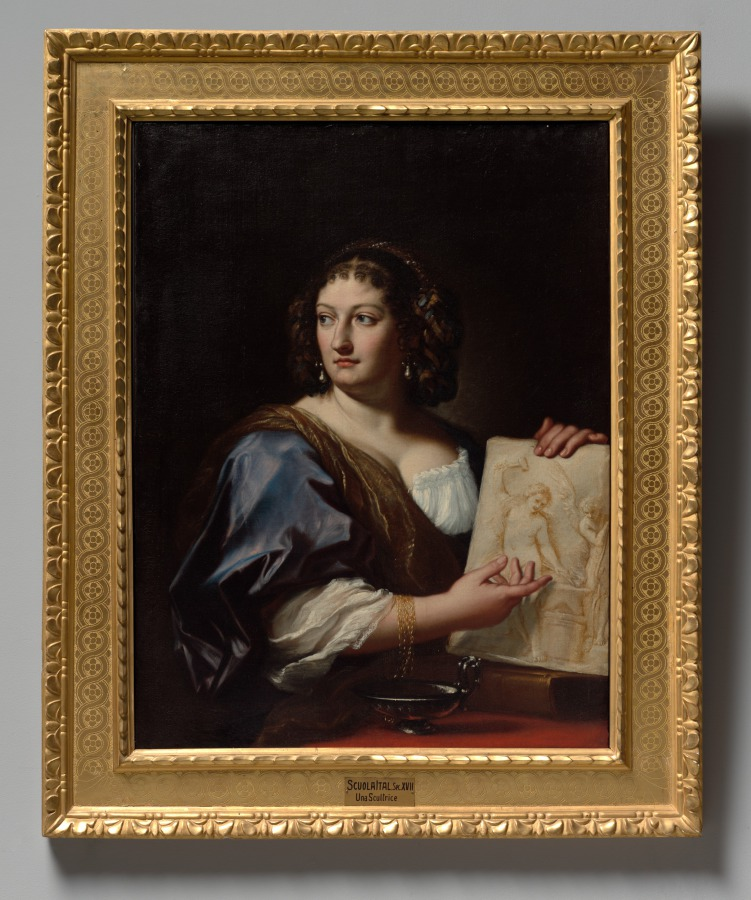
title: Portrait of Francesca Gommi Maratti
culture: Italy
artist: Carlo Maratti (Italian, 1625–1713)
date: c. 1701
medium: Oil on canvas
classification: Painting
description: In 1700 Carlo Maratti’s wife died, permitting him to marry his longtime mistress, Francesca Gommi, who began modeling for the artist in the 1670s and was the mother of his only child, Faustina. This painting was presumably painted shortly after the marriage as an homage from the artist to his new wife. To introduce an allegorical element into the composition, Maratti included a painting within a painting—in this case a drawing depicting Venus forging the love-darts of her adolescent son Cupid, suggesting that love will conquer all.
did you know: The sitter holds a drawing representing Venus making Cupid's weapons, symbolizing the power of love to conquer all.